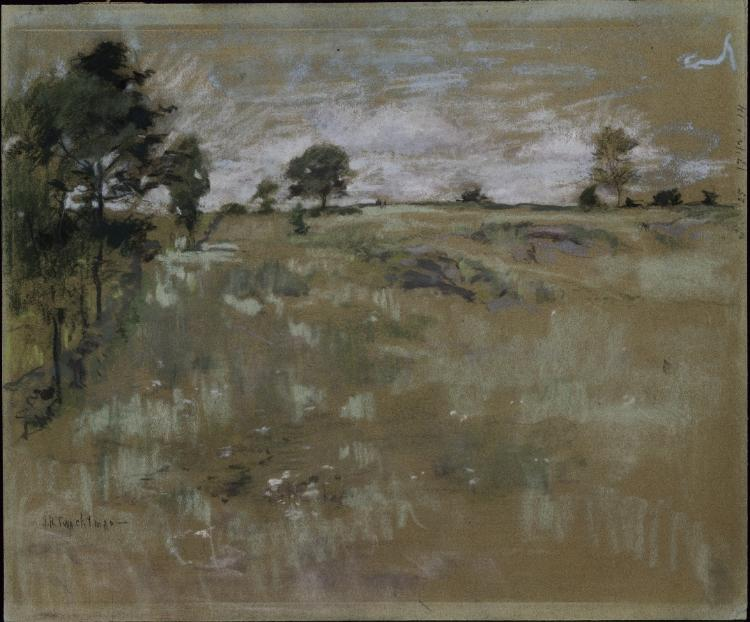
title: Pastures, Branchville, Connecticut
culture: America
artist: John Henry Twachtman (American, 1853–1902)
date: c. 1888–91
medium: pastel on composition board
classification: Drawing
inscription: signed, lower left, in crayon: J.H. Twachtman - ; along right edge, in graphite: 25 17 1/2 x 14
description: In the mid-1880s a group of American artists joined together to promote the expressive qualities of pastel. As a member of this group, known as the Society of Painters in Pastel, Twachtman contributed actively to their last three exhibitions in 1888, 1889, and 1890. As in this example, Twachtman incorporated the tone of his papers into his imagery, so that the paper becomes a part of the design itself. The most frequent subjects of his pastels were views of the fields and undulating countryside of Greenwich, Connecticut, with gentle rhythms punctuated by occasional trees and patches of wildflowers.